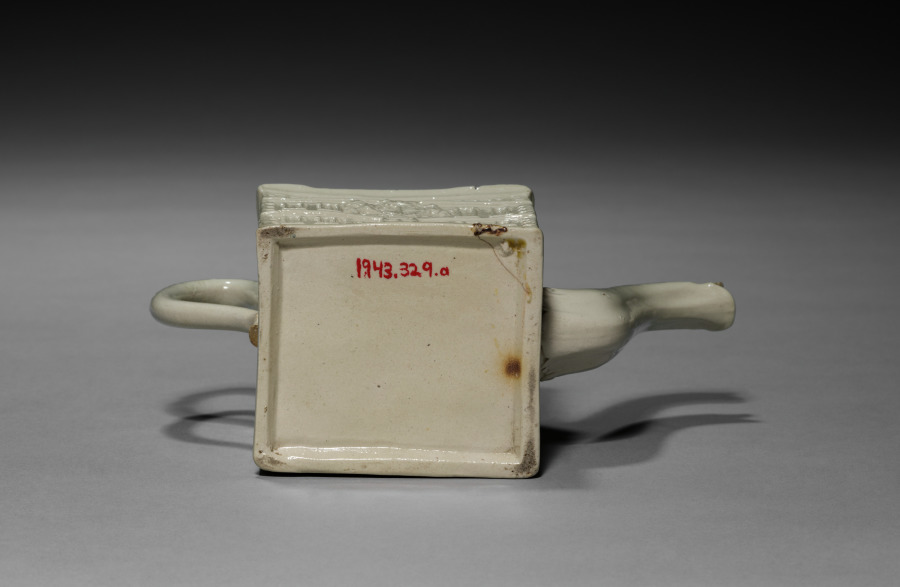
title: Teapot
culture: England, Staffordshire, 18th century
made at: Staffordshire Factory (British)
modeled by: Aaron Wood (British)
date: 1740–1750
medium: salt-glazed earthenware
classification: Ceramic